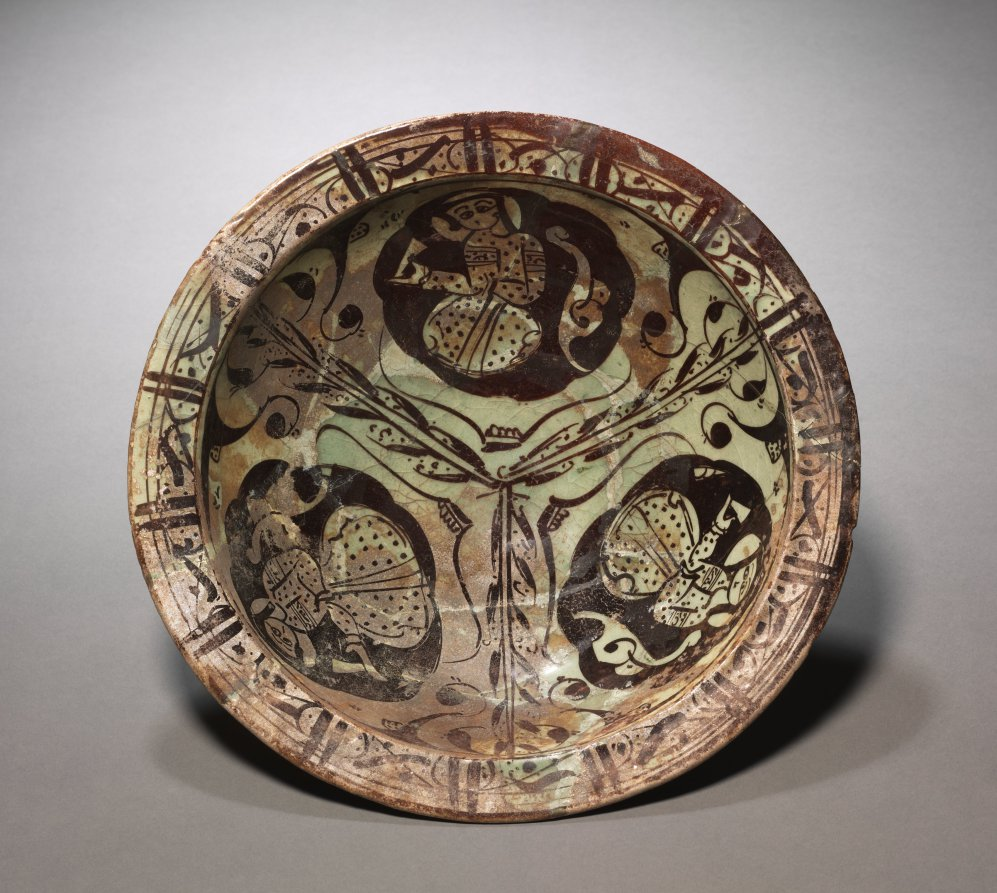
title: Bowl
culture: Ayyubid Syria, Rusapha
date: late 1100s–early 1200s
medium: fritware with luster-painted design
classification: Ceramic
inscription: Rim decoration may represent highly abstracted scripts but there are no legible words.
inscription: Label on bowl reads: "Parish-Watson & Co., Inc./ Old Chinese Porcelains / 44 E. 57th St., NY, NY"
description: This deep bowl with a wide flat rim is coated with a pale sea-green glaze. The interior is divided into three triangular sections by a simple foliate pattern. Within each triangle, a seated figure holding a cup is reserved in splashes of chocolate-colored luster. The rim is decorated with 15 panels containing freely painted dots and strokes, which suggest highly abstracted script.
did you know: Fritware approximates the appearance of porcelain. Potters made a paste of ground quartz, clay, and glass, which when fired, created a compact white material closely resembling precious porcelain.